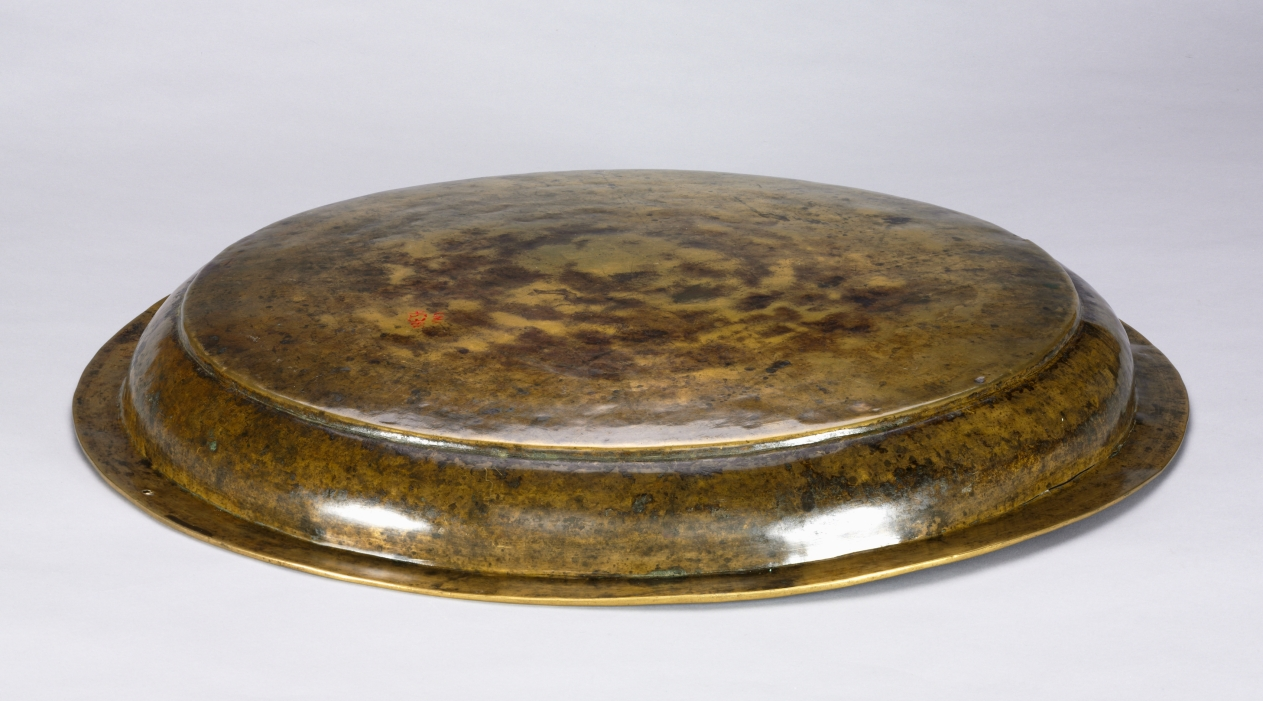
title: Tray Portraying Courtly Pleasures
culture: Syria, Ayyubid period (1171–1260)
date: 1240s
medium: sheet brass inlaid with silver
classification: Metalwork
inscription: The presence of ligatures in the narrow circular bands with interconnected human and animal figures suggests this may be a degenerate form of animated script. It is indecipherable.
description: This tray features images of courtly life interspersed with astronomical symbols. The scenes contained within large multilobed medallions display an enthroned prince with lions at his feet, a banquet, a hunt, dancers, and musicians. Contained within the concentric circles there are also references to solar and lunar motifs, including figures holding sunbursts and lunar crescents. This tray is made of a single sheet of brass and the silver inlay, which is best preserved on the tray’s inner curve, suggests its original brilliance.